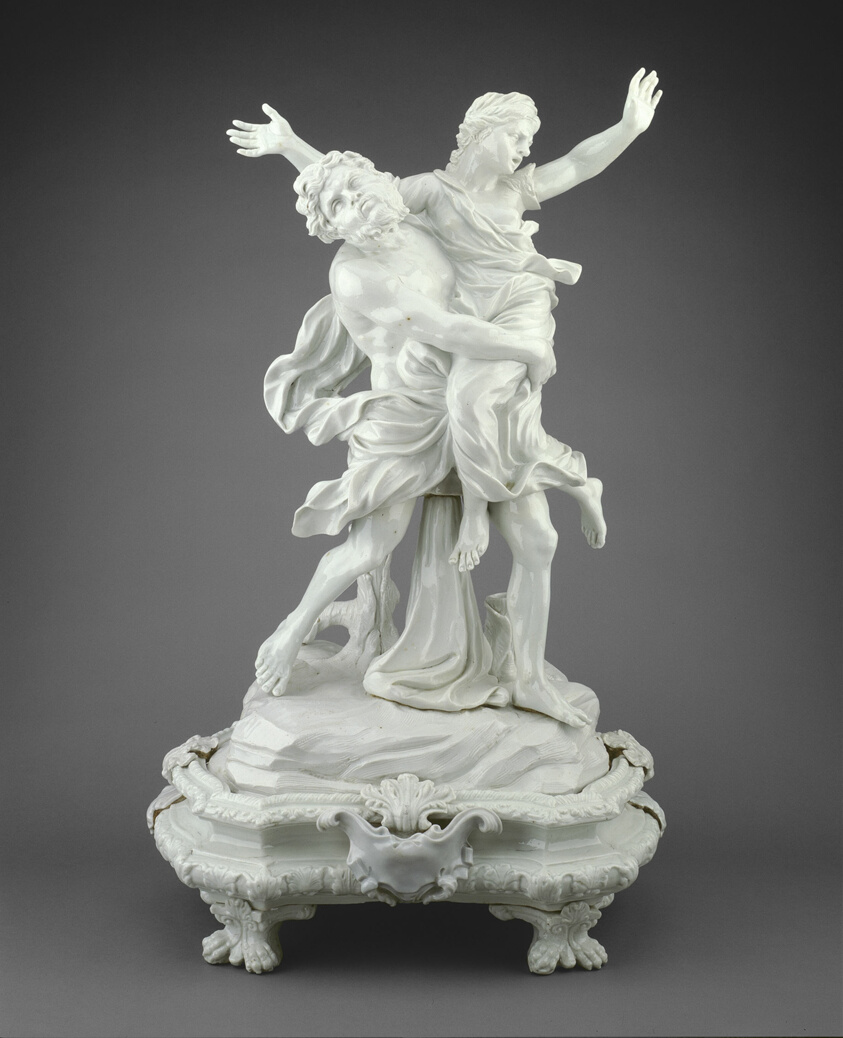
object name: Ceramics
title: The Abduction of Orithyia by Boreas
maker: Doccia Porcelain Manufactory; Italy, founded 1737; Gaspero Bruschi (Attributed to); Italian, 1701-1778; Giovanni Battista Foggini (After); Italian, 1652-1725; Vincenzo Foggini (After); Italian, late 17th century-c. 1755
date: c. 1745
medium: Hard-paste porcelain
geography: Italy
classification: statuette; sculpture; european decorative arts; ceramics